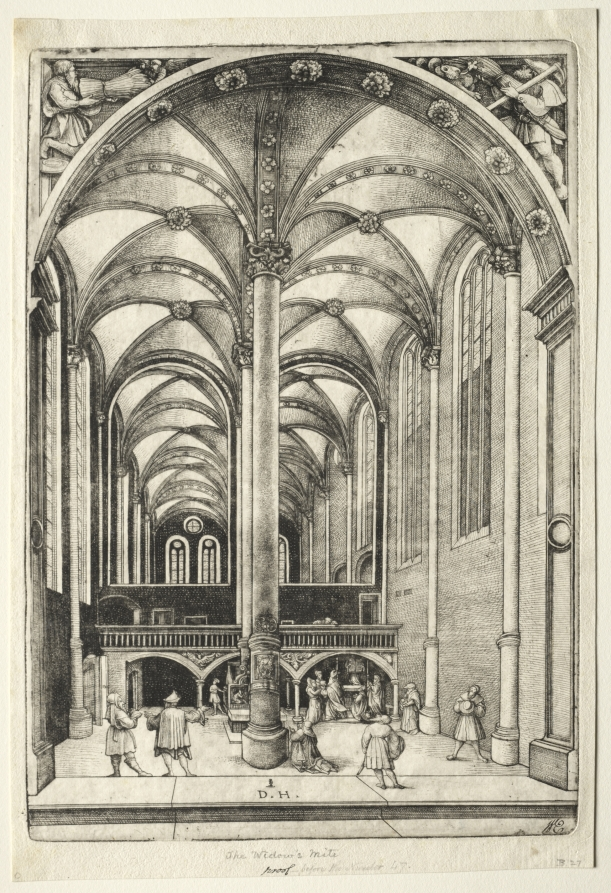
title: View in the interior of St. Catherine's chruch at Augsburg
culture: Germany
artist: Daniel Hopfer (German, c. 1470–1536)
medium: etching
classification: Print